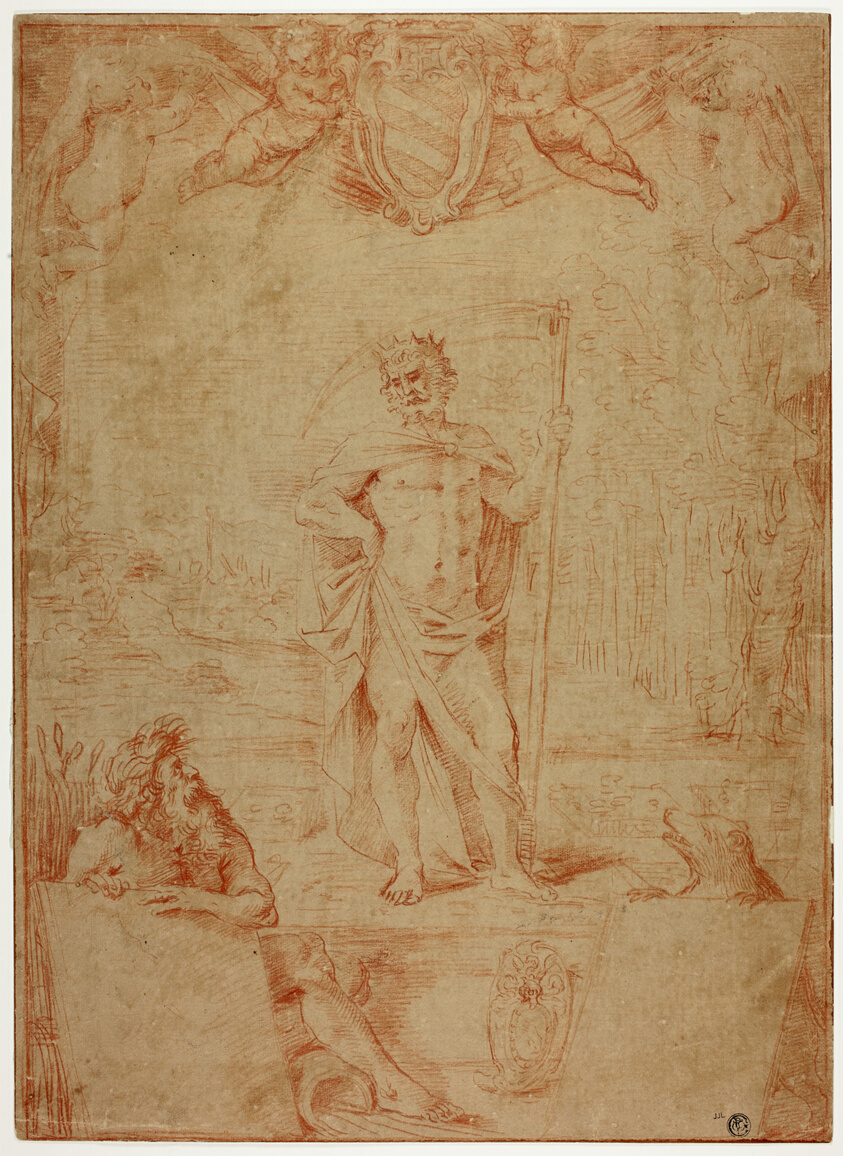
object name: Drawing and Watercolor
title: Study for Saturn Presiding over the City of Bologna, with the Arms of Cardinal Giulio Sacchetti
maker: Giovanni Battista Coriolano (Italian, before 1596-1649)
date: c. 1640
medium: Red chalk, over traces of black chalk, on tan laid paper, laid down on ivory laid card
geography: Italy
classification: chalk; drawings (visual works); prints and drawing